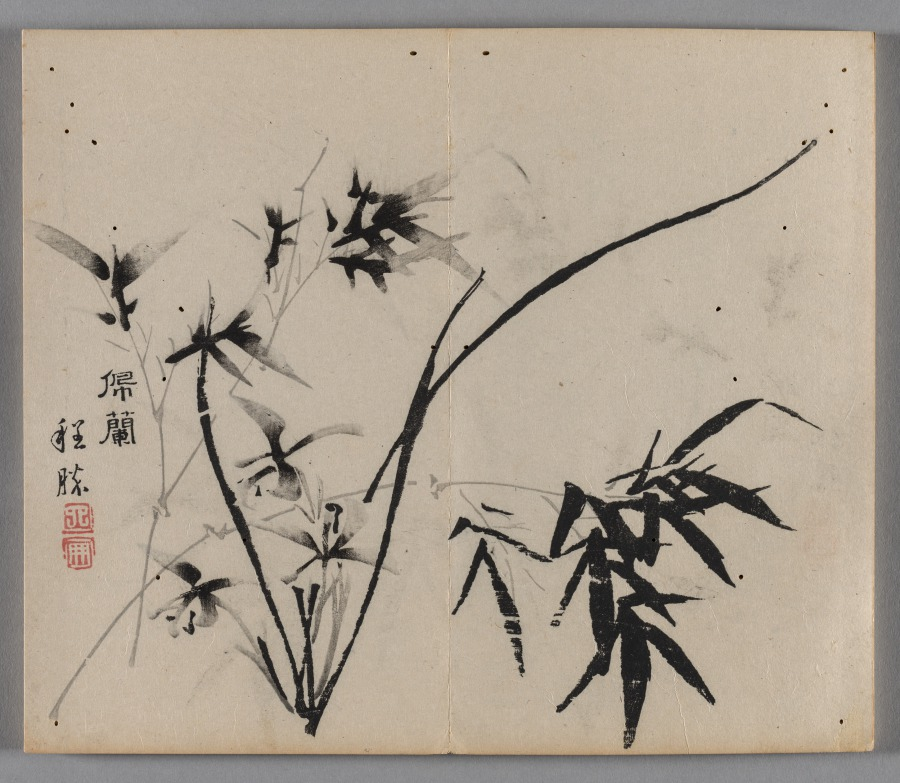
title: Ten Bamboo Studio Painting and Calligraphy Handbook (Shizhuzhai shuhua pu): Bamboo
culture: China, Qing dynasty (1644-1911)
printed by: Hu Zhengyan (Chinese, c. 1584–1674)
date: 1633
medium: Woodblock-printed book; ink and colors on paper; first edition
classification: Print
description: Color printing reached a level of perfection in the early 1600s, as seen in this Ten Bamboo Studio Collection of Calligraphy and Painting and the Mustard Seed Garden Manual of Painting (printed 1679 and 1701). The painterly quality, precision in registering (aligning) the woodblocks, and harmonious colors made them the most successful color print editions in Chinese history. Both editions were printed and compiled in Nanjing, spread nationwide, and had a great impact on the arts in Japan and Korea.